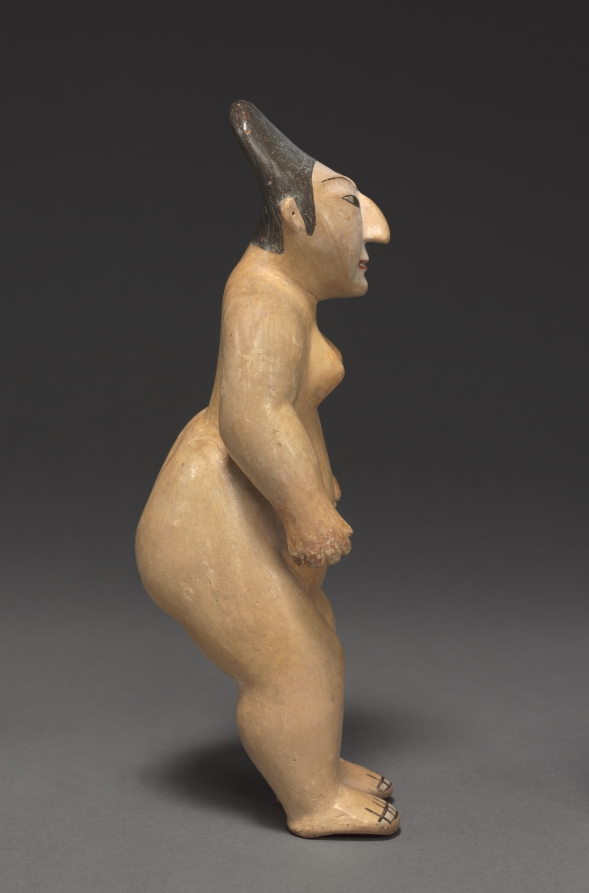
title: Female Figure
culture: Peru, South Coast, Nasca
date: 100 BCE–700 CE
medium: earthenware with colored slips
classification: Sculpture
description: This figure, which may once have worn small garments, might be a tomb offering. Her tapered head reflects the practice of cranial shaping, which may identify her social group and serve as a mark of beauty. Her fleshy hips likely refer to human and plant fertility, since food is the source of such bodily wealth. Her identity is unknown.